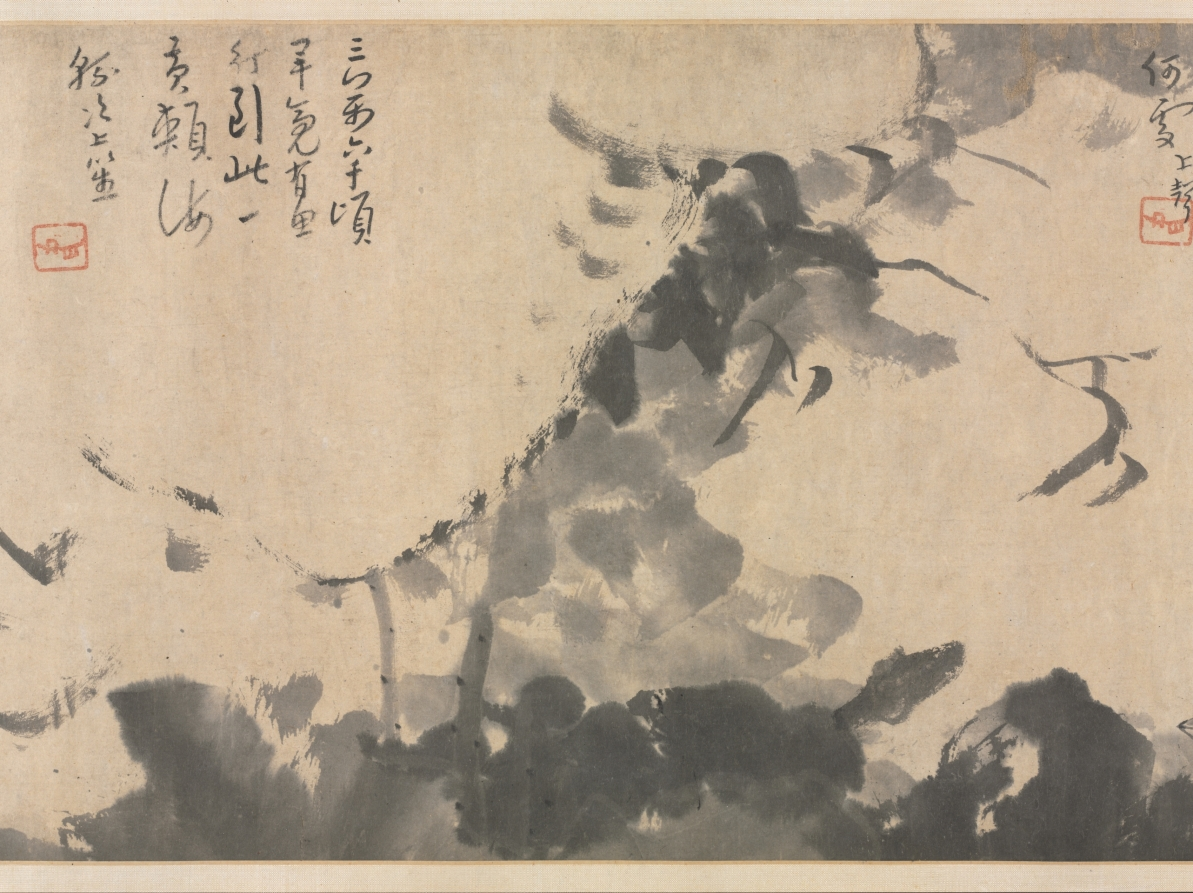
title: Fish and Rocks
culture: China, Qing dynasty (1644-1911)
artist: Bada Shanren (Chinese, 1626–1705)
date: mid- to late 1600s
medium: Handscroll; ink on paper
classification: Painting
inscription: 去天纔尺五，只見白雲行。 云何畫黃花，雲中是金城。 [印] 个山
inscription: 雙井舊中河，明月時延佇。 黃家雙鯉魚，為龍在何處。 [印] 个山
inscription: 三萬六千頃，畢竟有魚行。 到此一黃頰，海潮次上笙。 [印] 个山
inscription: 5 additional seals: 2 of Zhang Daqian 張大千 (1899–1983); 1 of Ta-an Chü-shih; 2 unidentified.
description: Bada Shanren, also called Zhu Da, a 17th-century painter who rejected conventions in favor of an individual, personal expression, is known for his unorthodox compositions of fish, flowers, birds, and rocks. Fish in his paintings are often looking upward toward heaven, swimming in a pond of undefined space. As a member of the Ming imperial family, Zhu Da lost his princely status and hid in a monastery when the Manchus, foreigners from the north, established the Qing dynasty in 1644. This scroll may have some autobiographical meaning, representing fish as leftover subjects (yimin) who lived in a void, having lost their roles in life after the fall of the dynasty.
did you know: After each poem, Bada Shanren used his so-called jixingyin seal 屐形印, which resembles the impression of a shoe on soft mud.